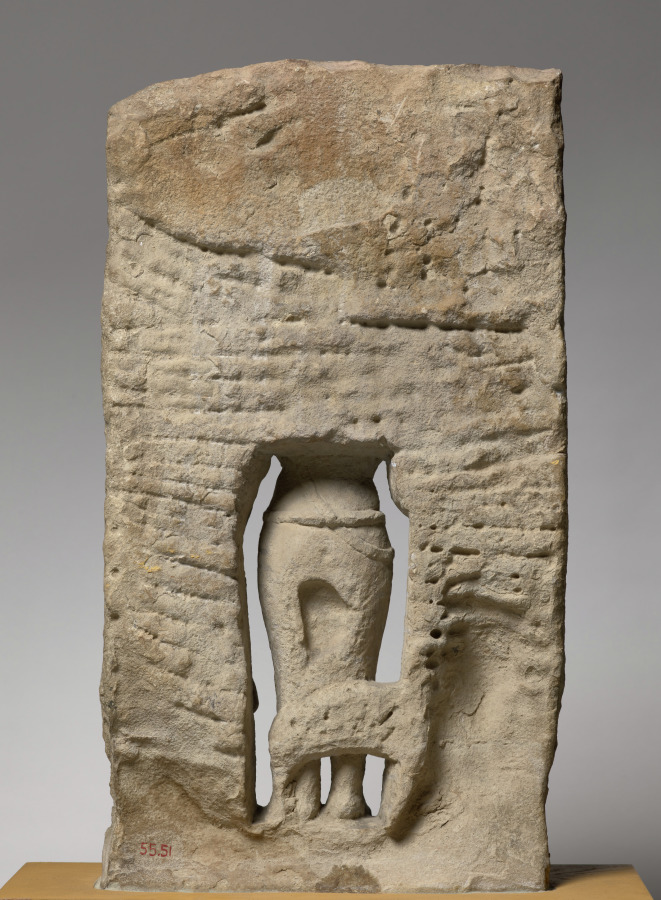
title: Agni, God of Fire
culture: India, Uttar Pradesh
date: c. 1000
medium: sandstone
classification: Sculpture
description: The Hindu god Agni, with flames rising behind him, is the figural form of the sacrificial fire, central to religious practice in India since the early second millennium BC. Agni’s mount is the goat, and together they preside over the Southeast. In the upper registers, Brahmans perform fire sacrifice, preach to disciples, and practice "hot yoga."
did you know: This sculpture is on the cover of the Penguin Classics edition of the Hindu "Laws of Manu."